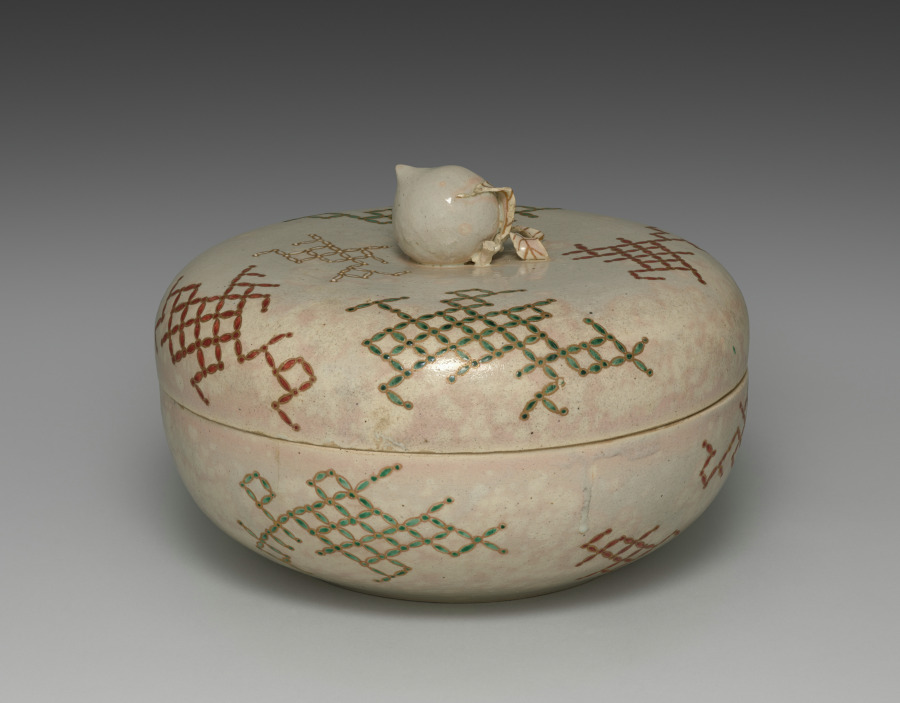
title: Covered Bowl with Seven Treasures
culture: Japan, Edo period (1615–1868)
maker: Seifū Yohei II (Japanese, 1844–1878)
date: 1861–78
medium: Stoneware with overglaze color enamel and gold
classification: Ceramic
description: The box lid for this large covered bowl by Yohei II identifies it as in the style of Ninsei, a reference to Nonomura Ninsei. Overglaze enamels in red, green, and white sit within lattices of jewel-shaped gold forms scattered across the lid and base in a design known as the seven treasures. At the center of the lid is a knob in the shape of a peach with a stem and leaves. A prominent feature of the piece is the appearance of warm pink dots known as gohon. Here creamy at their center and with a gradation to almost red at the edges, they appear during firing due to high iron content in the clay. Pieces with this effect were made in emulation of certain ash-glazed ceramics imported from Korea. The originals were made to order for the Japanese market at a kiln in Busan. The kiln was established within the Japanese diplomatic compound in that port city by the lord of Tsushima in 1639 and continued production until 1717. In the 17th century, teabowls from Korea in a variety of styles were extremely popular among practitioners of Japanese-style tea, and they were soon copied by ceramists active on the archipelago, including in Kyoto.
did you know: The peach's leaf veins are detailed in gold.